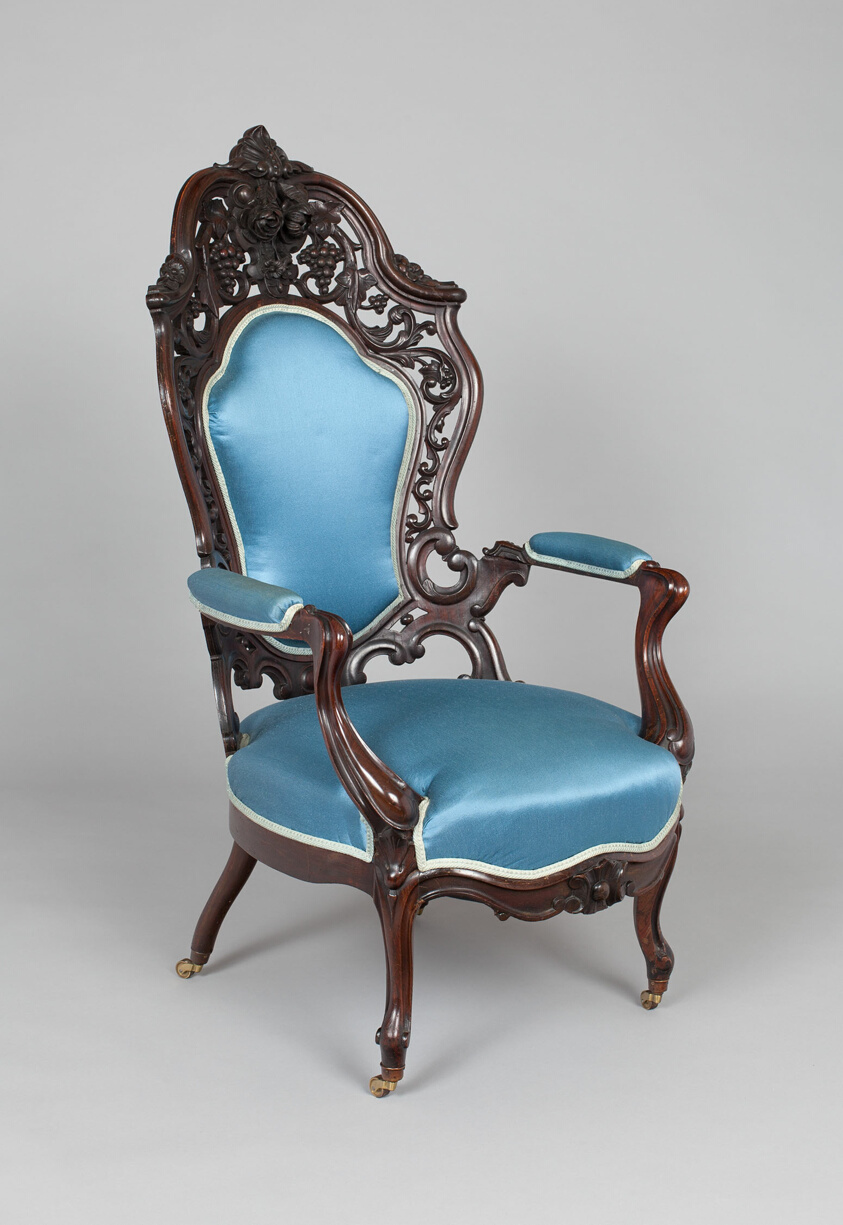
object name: Furniture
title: Armchair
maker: John and Joseph W. Meeks Company; American, active 1836–59; New York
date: 1856–65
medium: Rosewood and upholstery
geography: New York City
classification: seating; furniture; american decorative arts; american arts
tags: furniture